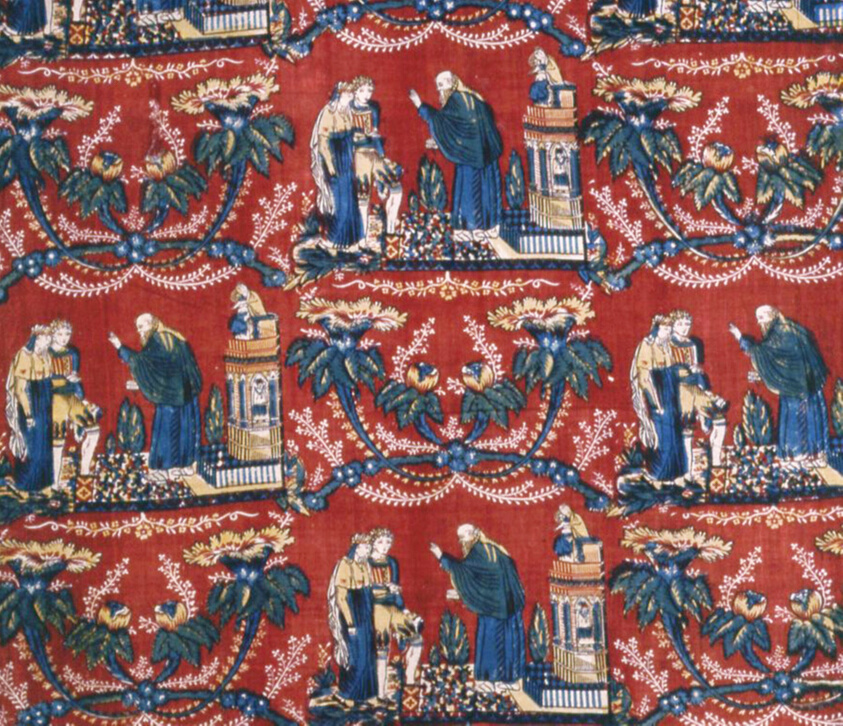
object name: Textile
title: Le Mariage (Furnishing Fabric)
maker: Engraved by Alexis Nicolas Nöel (French, 1792–1871) after a design by Jean Baptiste Mallett (French, 1759–1835); France, Bolbec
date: c. 1810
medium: Cotton, plain weave; block printed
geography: Bolbec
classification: textile; weaving - printed; furnishing textile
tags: propaganda